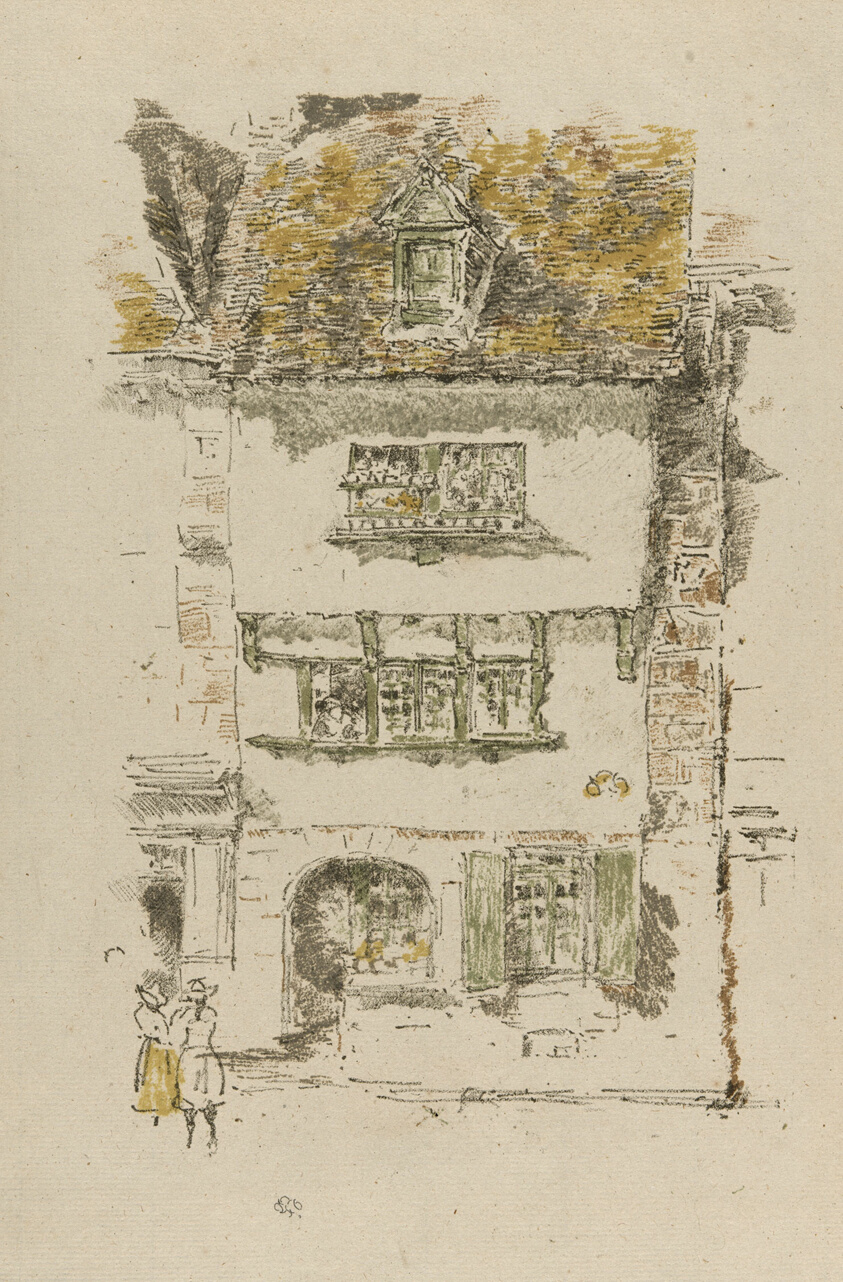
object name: Print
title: Yellow House, Lannion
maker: James McNeill Whistler; Printed by Henry Belfond; American, 1834-1903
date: 1893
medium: Transfer lithograph, with scraping, from six stones in black (keystone), greenish gray, brown, green, yellow, and gray on ivory laid paper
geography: United States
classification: transfer lithograph; lithograph; print; prints and drawing; paper